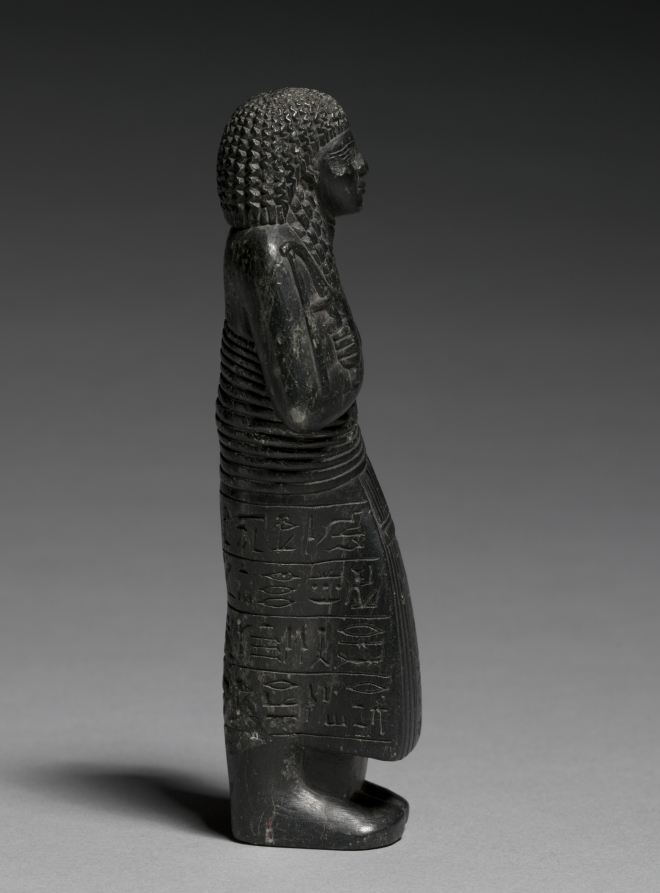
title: Shawabty of Nebmehyt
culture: Egypt, New Kingdom (1540–1069 BCE), Dynasty 19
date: c. 1295–1240 BCE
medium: steatite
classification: Funerary Equipment